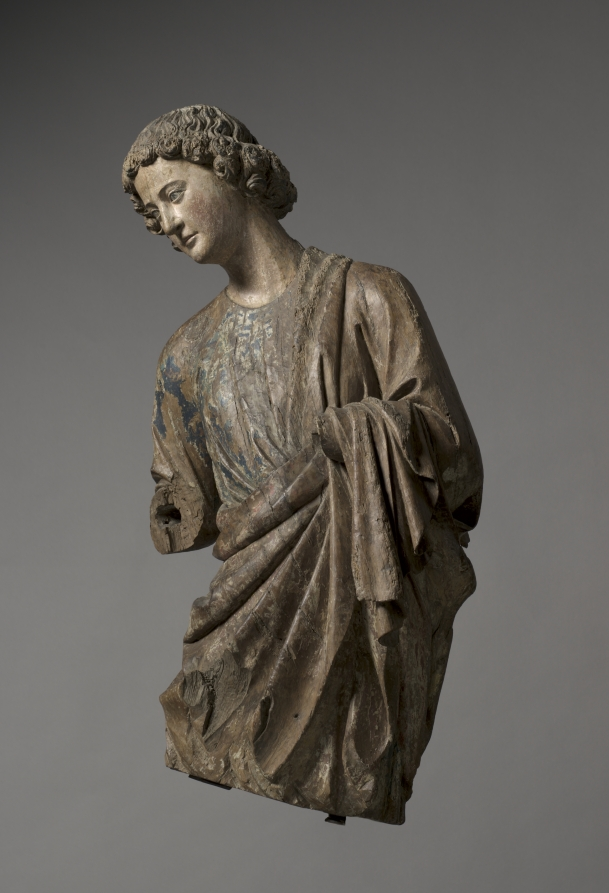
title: Angel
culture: France, vicinity of Reims, 13th century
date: c. 1250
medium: walnut with traces of gilding and polychromy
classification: Sculpture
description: Surviving in fragmentary condition, this pair of angels lacks lower arms, hands, wings, and attributes. Their original paint and gilding, now almost entirely lost, once rendered their garments a rich brocade and their hair a luxuriant gold. Nonetheless, in their graceful poses and sublime faces—which may portray tragic interest, anguish, or deep concern—their original delicacy and power are still evident. They embody the monumental style of 13th-century High Gothic cathedral sculpture in France. Their style specifically suggests they were carved in or around Reims, possibly by sculptors associated with the cathedral there. Their original placement is unknown, but they may have flanked an altar on columns.